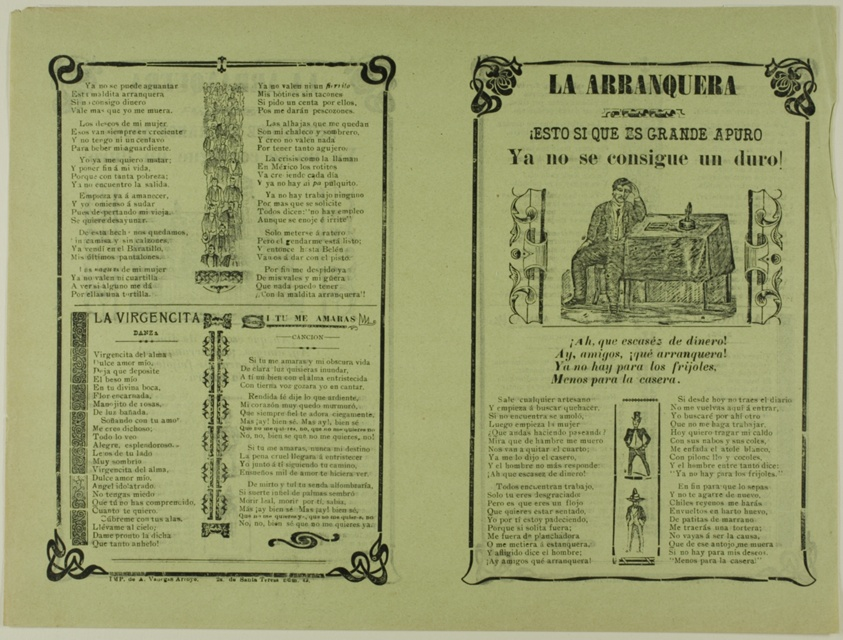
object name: Print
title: La arranquera (Poverty)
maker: José Guadalupe Posada (Mexican, 1852-1913); Manuel Manilla (Mexican, 1830-c.1900)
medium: Relief print on paper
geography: Mexico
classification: relief etching; print; prints and drawing